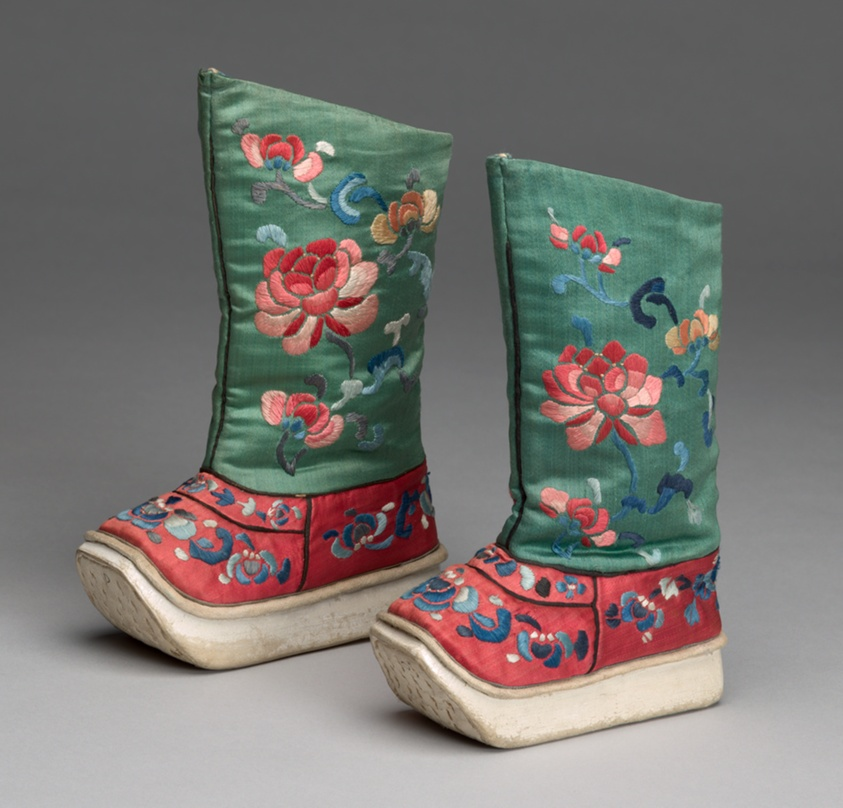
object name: Costume and Accessories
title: Man's Boots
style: qing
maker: China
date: Qing dynasty (1644–1911), 19th century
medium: Silk, satin weave, with needlework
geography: China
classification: textile; weaving; shoes - needlework; costume accessory - shoe; costume; dress (garment); clothing